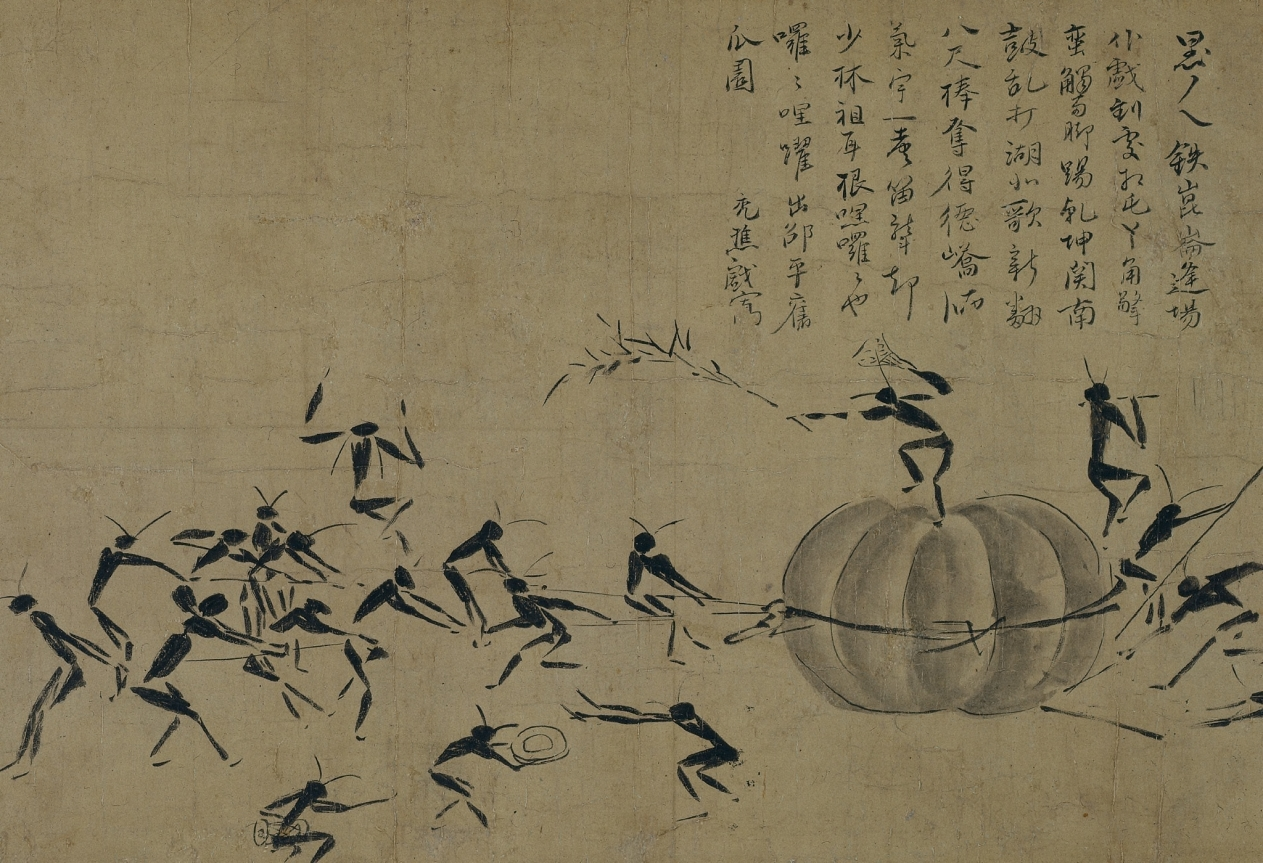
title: Festival of Insects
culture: Japan, Edo period (1615–1868)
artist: after Motsurin Jōtō (Japanese, d. 1492)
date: c. 1615–1868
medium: Hanging scroll; ink on paper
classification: Painting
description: This painting depicts humanlike figures with antennae engaged in a festival procession. They transport a gourd like a float, with two teams pulling ropes in front, and others maneuvering it with poles from behind. They are accompanied by flutes and drums, urged on by a dancer holding a fan and a branch. The inscription is attributed to the monk-painter Motsurin Jōtō (Bokusai), well known in Japan as a disciple of Ikkyū Sōjun and an accomplished portrait artist.